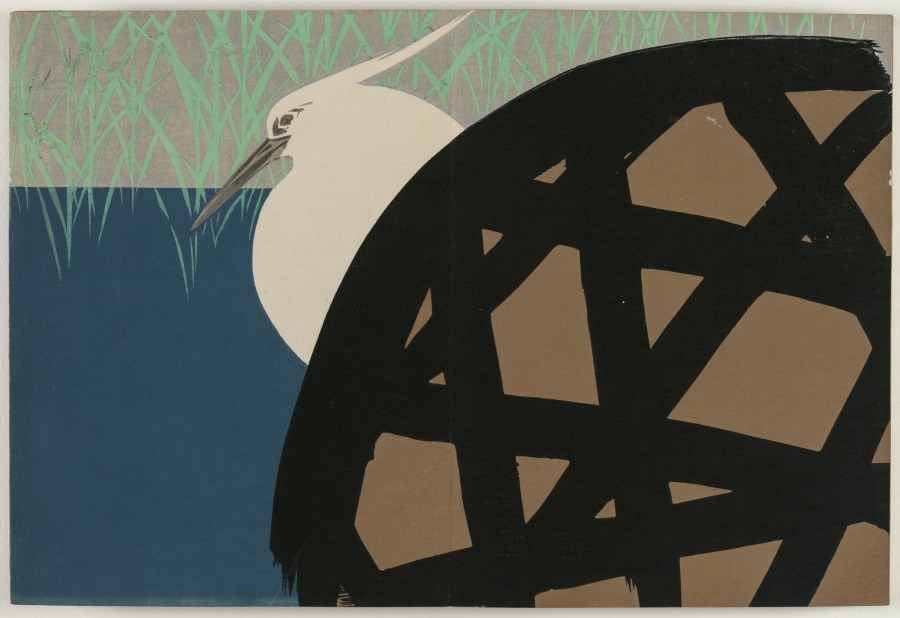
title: Flowers of a Hundred Worlds (Momoyogusa): White Heron (Shirosagi)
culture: Japan, Meiji period (1868–1912)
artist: Kamisaka Sekka (Japanese, 1866–1942)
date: 1909–10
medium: color woodcuts with gold and silver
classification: Bound Volume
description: This print from a set of three woodblock printed albums displays the graphic design prowess of Kamisaka Sekka. The images were first distributed one by one to subscribers to the series but later were reissued in bound form, like this book, for mass consumers. Each print features a vignette taken from nature or Japanese literature. Many of the scenes have a long history in Japan, originating in the 900s or 1000s and having been interpreted by all manner of artists since that time. Sekka’s selections hew closely to precedents from the Rinpa style originated by painter Tawaraya Sōtatsu (c. 1570–c. 1640) and calligrapher Hon’ami Kōetsu (1558–1637).